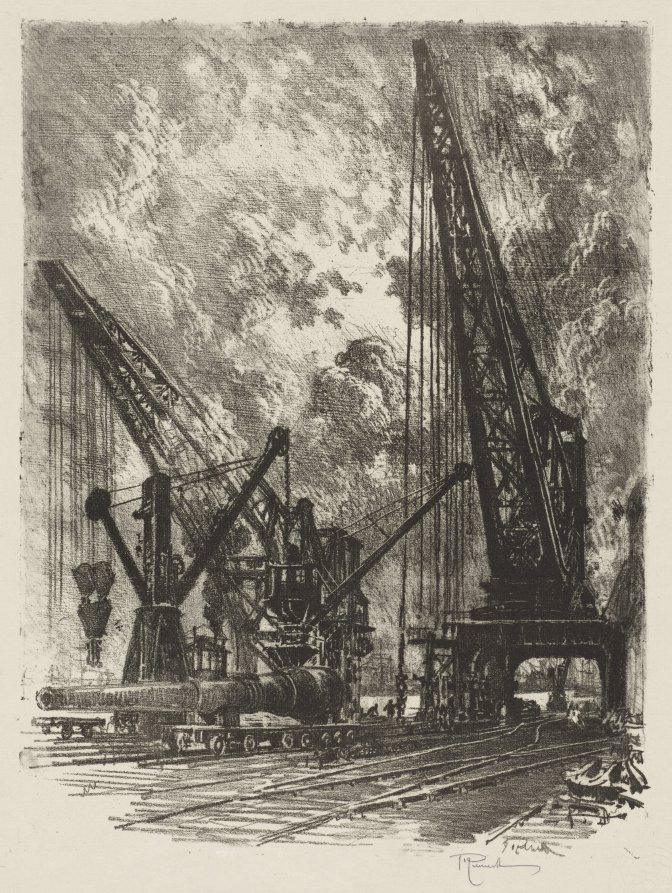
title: English War Work: Taking the Big Gun Away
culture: America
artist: Joseph Pennell (American, 1857–1926)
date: 1916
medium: lithograph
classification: Print